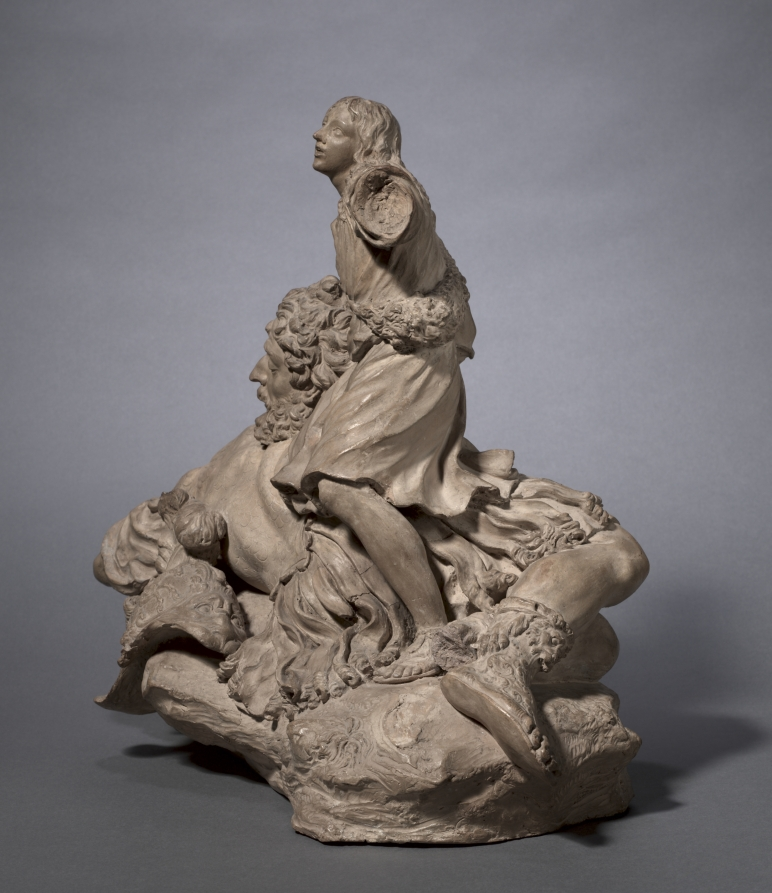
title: David Victorious over Goliath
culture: Italy, Florence, 18th century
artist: Giovanni Battista Foggini (Italian, 1652–1725)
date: 1722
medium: terracotta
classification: Sculpture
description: This terracotta model was used to cast part of a series of bronzes on religious subjects. Foggini depicted David humbly, a compelling contrast to the more traditional Florentine approach of David as a proud victor. The subject of David was especially important because he had long symbolized Florence: the city was often able to overcome its larger rivals, much like David defeated the giant Goliath.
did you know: David was a popular figure in Florentine art and often embodied civic liberty.